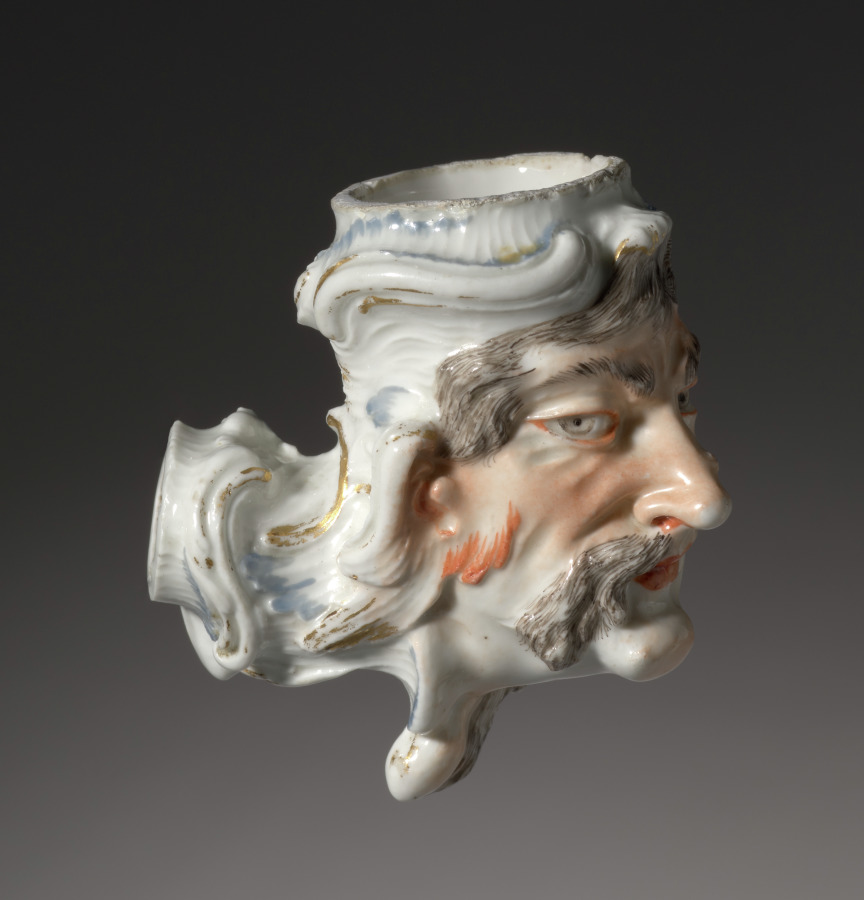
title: Pipe Head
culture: Germany, Nymphenburg, 18th century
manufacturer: Nymphenburg Porcelain Factory (German, founded 1747)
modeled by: Franz Anton Bustelli (Swiss, 1723–1763)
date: mid-1700s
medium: porcelain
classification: Ceramic